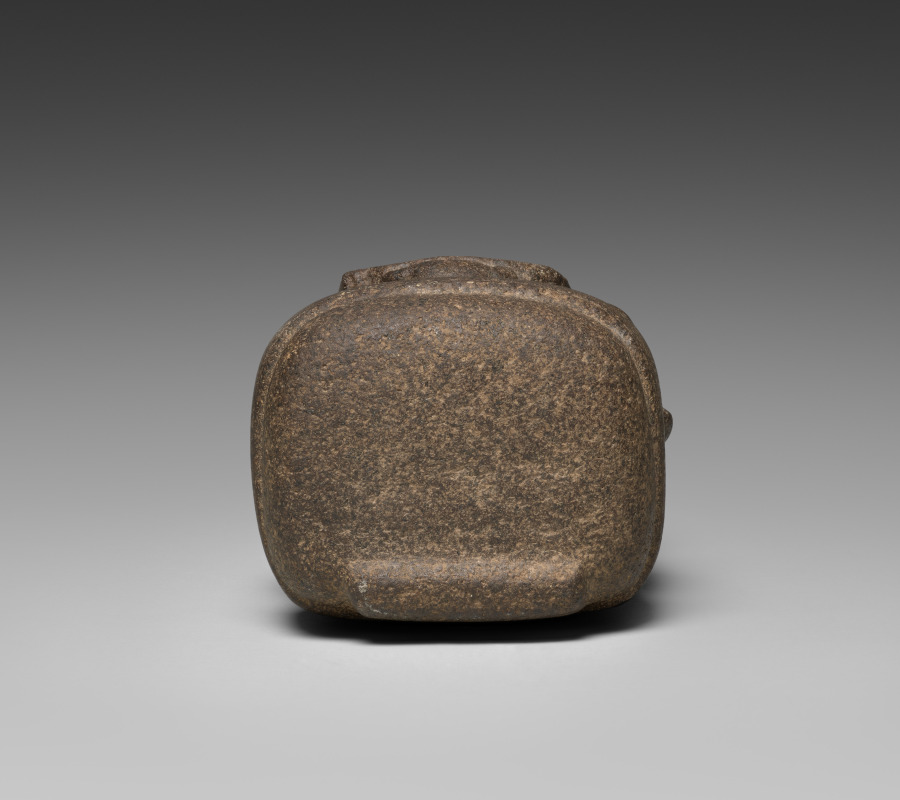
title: Celt with Deity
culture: Mesoamerica, Mexico, Olmec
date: 1000–300 BCE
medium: stone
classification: Sculpture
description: This ceremonial object has the head of a deity and a body shaped like an axe blade (celt) used to clear land for agriculture. The flared mouth, toothless gums, and fangs are typical of Olmec supernatural beings. The meaning of the body's "four-dots-and-a-bar" motif is unclear, but it sometimes appears in depictions of plants. The deity, then, seems to be associated with fertility.